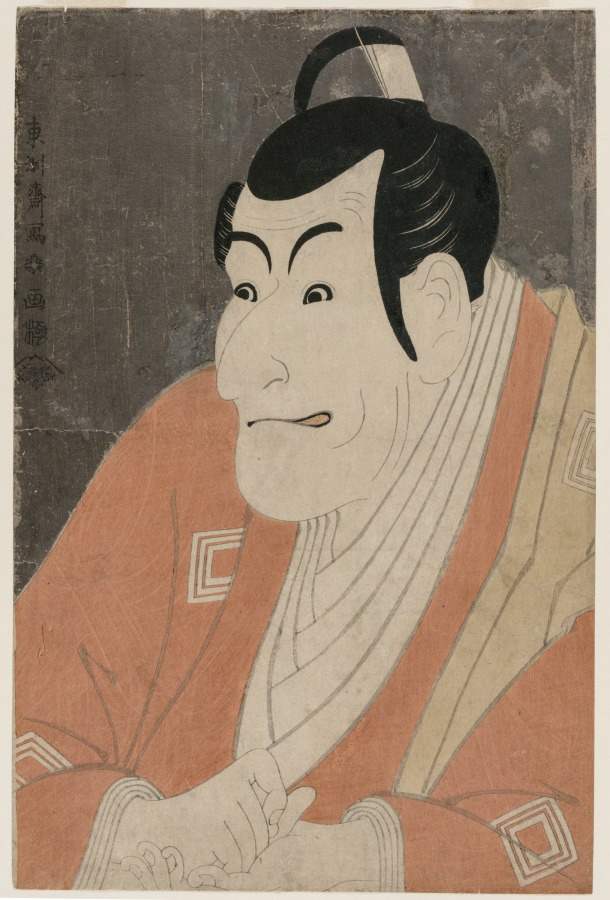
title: Ichikawa Ebizō IV (Danjurō) as Takemura Sadanoshin in The Loving Wife's Parti-Colored Reins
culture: Japan, Edo period (1615–1868)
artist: Tōshūsai Sharaku (Japanese, active 1794–95)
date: 1794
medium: color woodblock print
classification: Print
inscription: Signature: Toshusai Sharaku ga. Publisher: Tsutaya Juzaburo (emblem). Censorship Seal: kiwame.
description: Ichikawa Ebizō IV’s (1741–1806) character, an actor called Takemura Sadanoshin, is permitted to perform opposite his daughter so he can see and hear her for the last time before her banishment for a forbidden love affair. This design belongs to a category of Japanese prints called “actor images” (yakusha-e or 役者絵). They were collected by fans of popular Kabuki actors. Kabuki is a kind of entertainment that got its start in the early Edo period, evolving from dance performances with simple storylines to long plays with complex plots, elaborate sets, and full musical accompaniments. Performers wear showy costumes and heavy makeup and strike poses called mie at critical moments in the narrative. Dialogue is spoken in a stylized way that resembles singing.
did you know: A member of the famous Ichikawa acting family, Ebizo IV is recognized here by his family crest of three nested boxes, visible on his robes.